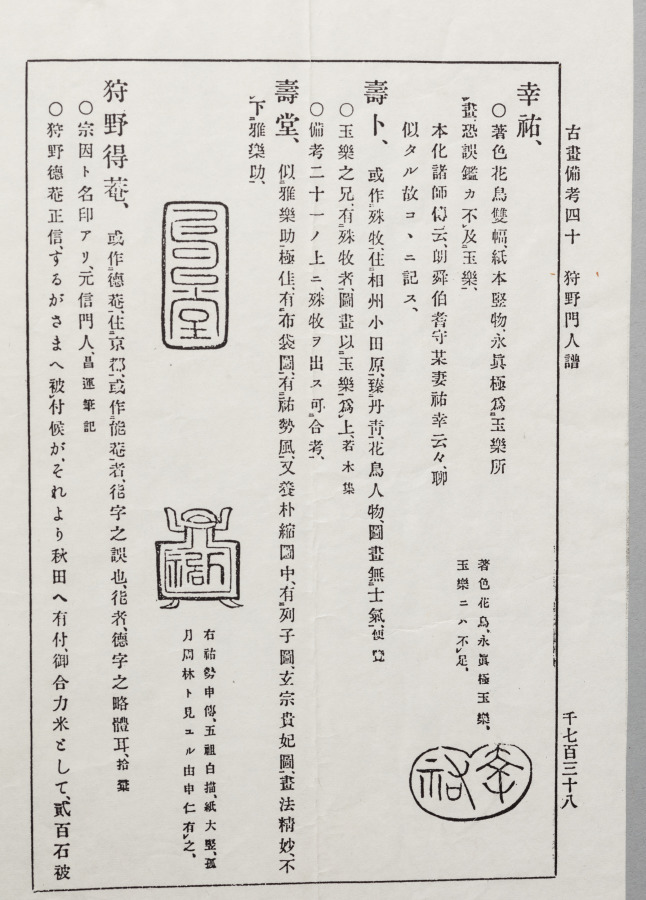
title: Landscape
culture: Japan, Muromachi period (1392–1573)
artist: Judō (Japanese, active 16th century)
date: 1500s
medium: hanging scroll, ink and light color on paper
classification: Painting